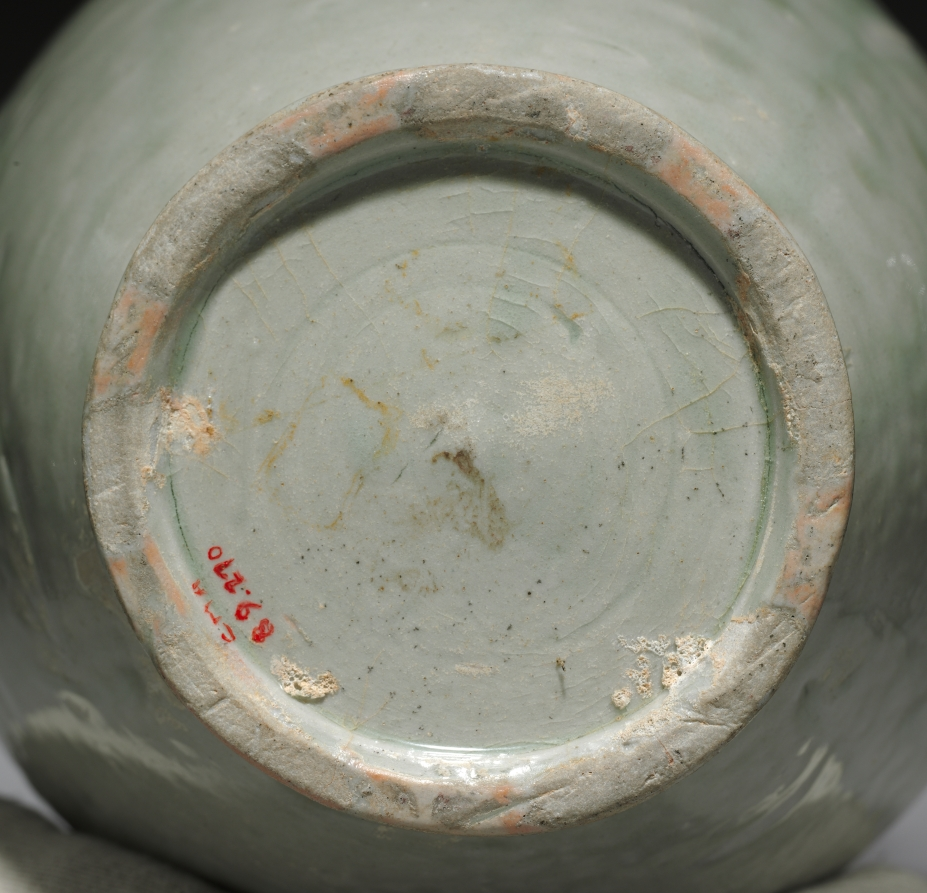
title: Vase with Peonies and Five Spouts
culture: China, Zhejiang province, Hangzhou, Southern Song dynasty (1127-1279)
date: 900s–1000s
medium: green-glazed porcelaneous stoneware with incised decoration, Yue ware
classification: Ceramic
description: "In full autumn wind and dew the kilns of Yue open; And a thousand peaks are despoiled of their halcyon green" (translated by S. W. Bushell). These 9th-century poetic lines glorify the highly prized green-glazed Yue wares of the Tang period. This later example has a pale green glaze that is glassy and consistent, which indicates a precise control of the glaze components as well the kiln atmosphere by reducing the amount of oxygen at some stage during the firing.